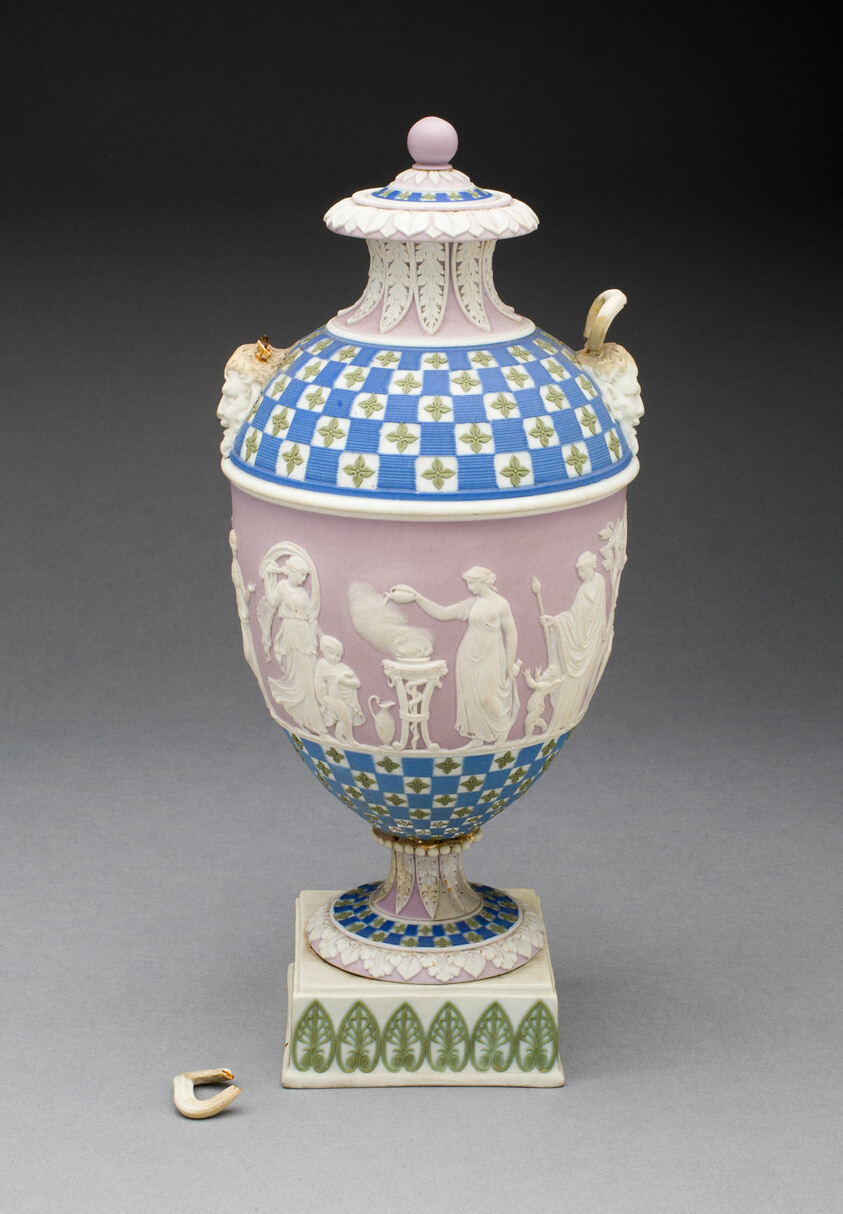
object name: Ceramics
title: Vase with Sacrifice to Ceres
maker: Wedgwood Manufactory (England, founded 1759)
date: c. 1800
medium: Stoneware (jasperware)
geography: Burslem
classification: vase; vessel; ornamental piece; stoneware; european decorative arts; ceramics